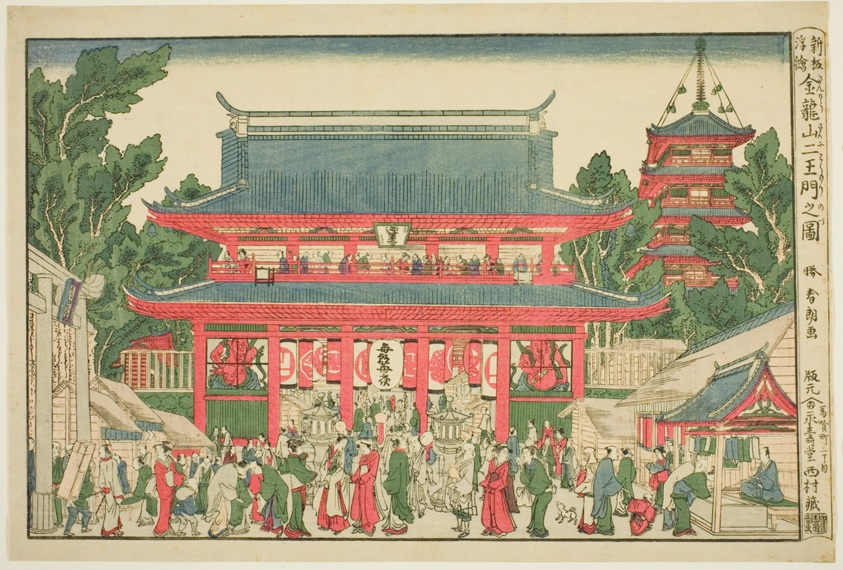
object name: Print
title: A Perspective View: The Two Deva Kings Gate of Kinryuzan Temple (Ukie: Kinryuzan niomon no zu)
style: Japanese (culture or style), edo (japanese period), Japanism, East Asian, asian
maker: Katsushika Hokusai 葛飾 北斎; Japanese, 1760-1849; Brush name: Katsukawa Shunro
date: 1781/89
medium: Color woodblock print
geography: Japan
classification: woodblock print; print; asian art